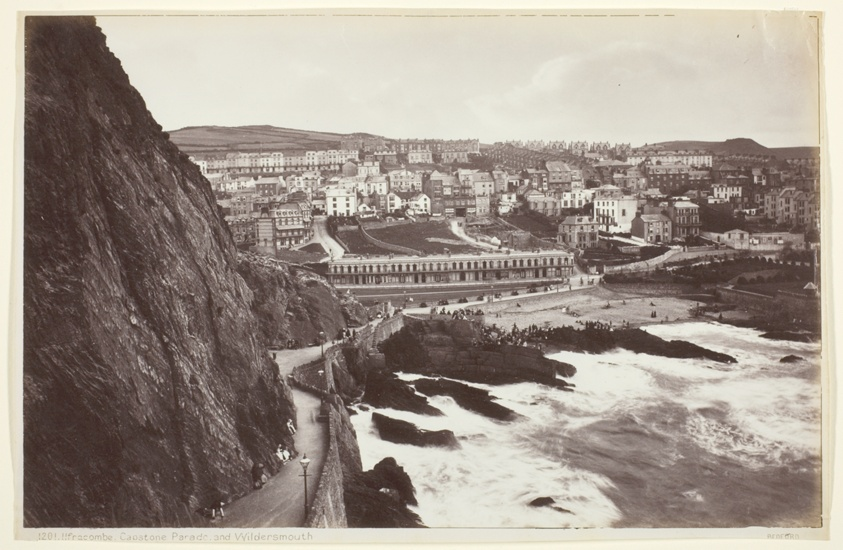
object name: Photograph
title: Ilfracombe, Capstone Parade and Wildersmouth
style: 19th century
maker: Francis Bedford (English, 1816–1894)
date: 1860/94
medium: Albumen print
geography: England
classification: albumen silver print; photographic process; photography; photograph